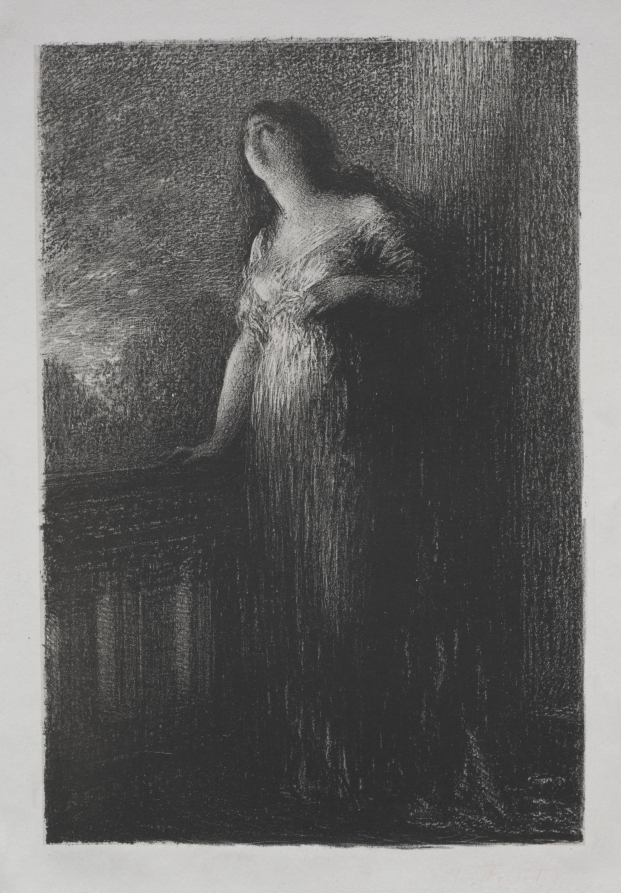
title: Confiding in the Night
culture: France, 19th century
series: Romeo and Juliet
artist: Henri Fantin-Latour (French, 1836–1904)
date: 1888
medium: lithograph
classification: Print